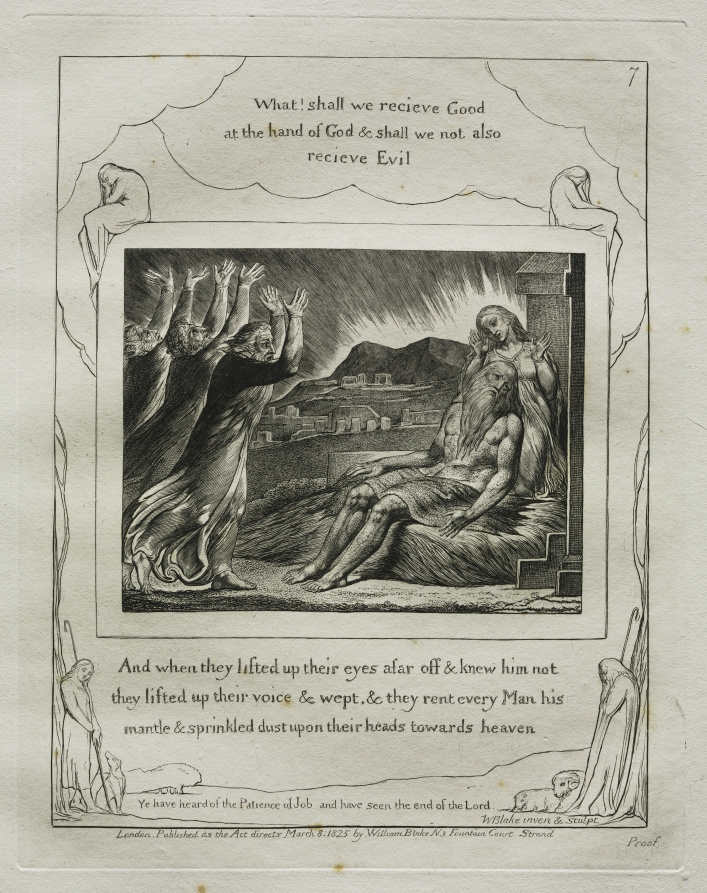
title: The Book of Job: Pl. 7, And when they lifted up their eyes afar off and knew him not / they lifted up their voices and wept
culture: England, 18th century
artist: William Blake (British, 1757–1827)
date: 1825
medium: engraving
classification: Portfolio